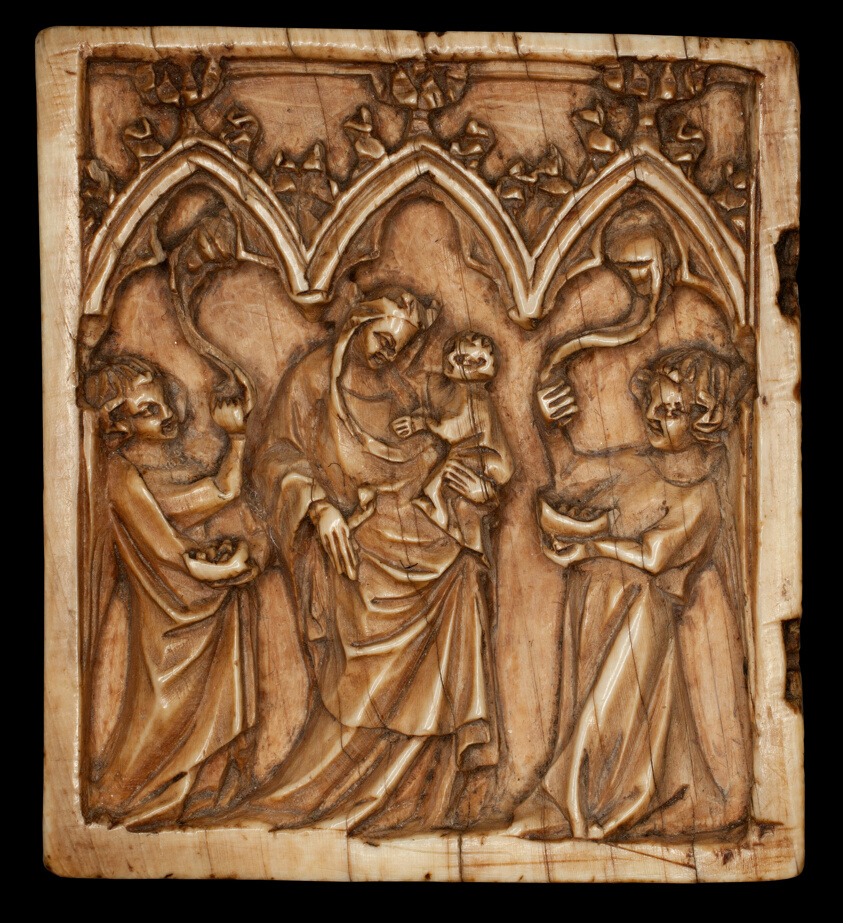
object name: Sculpture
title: Diptych Panel with Virgin and Child and Two Angels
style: 14th century, 15th century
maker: French; Île-de-France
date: 1375/1400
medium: Ivory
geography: France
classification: relief; sculpture; ivory; religious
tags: Virgin and child/Madonna and child, architectural details, Christianity, Christian subjects, religious figures, religious scenes, religious, religion, figures, angels, woman with children, child, woman, mother and child, sons, mother, Jesus, Virgin Mary, panel